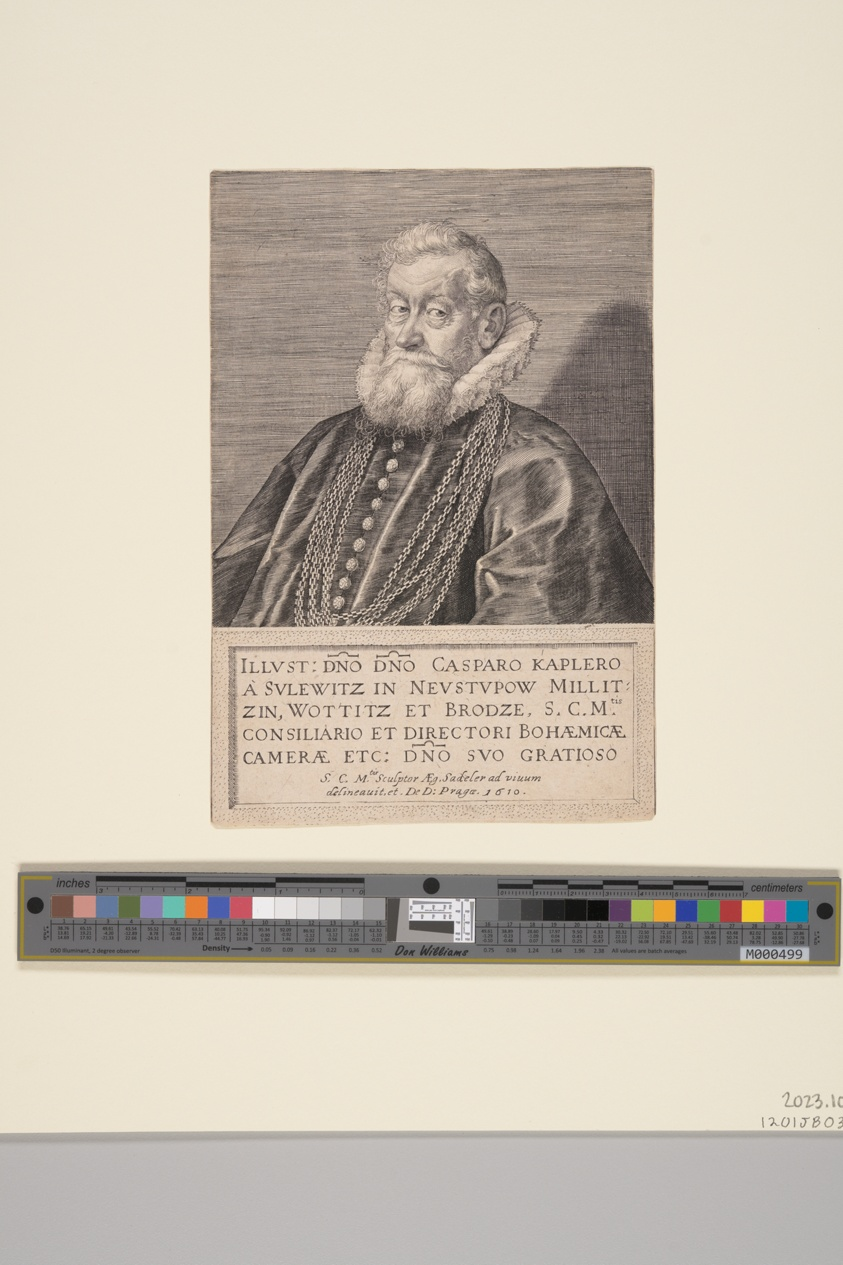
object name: Print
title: Gaspard Kaplir von Sulewitz, Councilor to the Emperor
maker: Aegidius Sadeler II; Flemish, c. 1570–1629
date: 1610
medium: Engraving on paper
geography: Flanders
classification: engraving; paper; print; prints and drawing